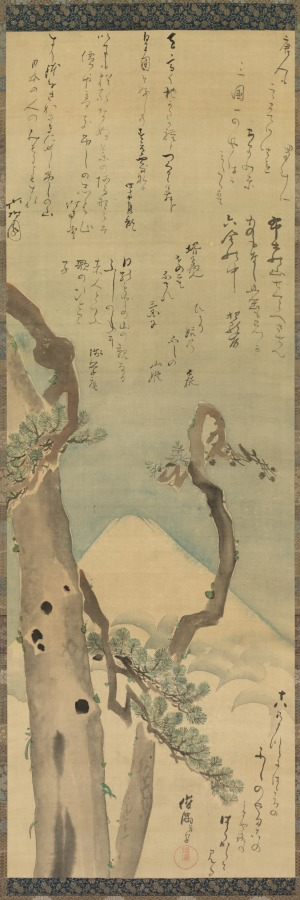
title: Mt. Fuji through Pines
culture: Japan, Edo period (1615–1868)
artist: Kubo Shunman (Japanese, 1757–1820)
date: late 1700s-early 1800s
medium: hanging scroll, ink and color on silk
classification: Painting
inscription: Signed: painted by Shunman and others (Shunman narabi utsu [su]) Sealed: Shunman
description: Kubo Shunman dashed off this loose image of Mt. Fuji viewed in the distance from behind pine trees as a performance painting, or sekiga. He did it on the spot in the company of members of his poetry club. Six of them, including the club's founder Yadoya no Meshimori (Rokujuen, 1753–1830), added kyoka poems, 31-syllable poems like the classical Japanese waka poem in form, but with a heavy emphasis on humor. Shunman jotted down a poem as well, in the bottom right corner of the painting, before signing and sealing it. Each poem takes the painted image as its point of departure.